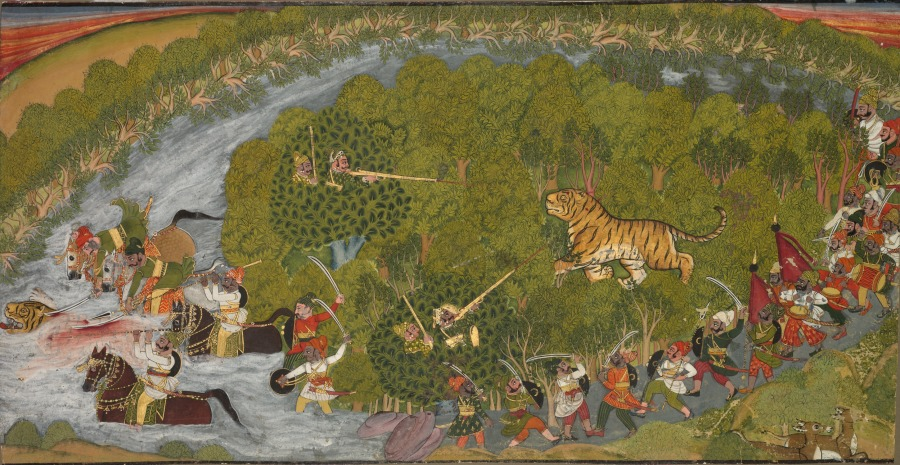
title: Tiger Hunt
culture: India, Kotah School, Raja Umed Singh period (1771-1820)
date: c. 1800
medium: Gum tempera, ink, and gold on paper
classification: Painting